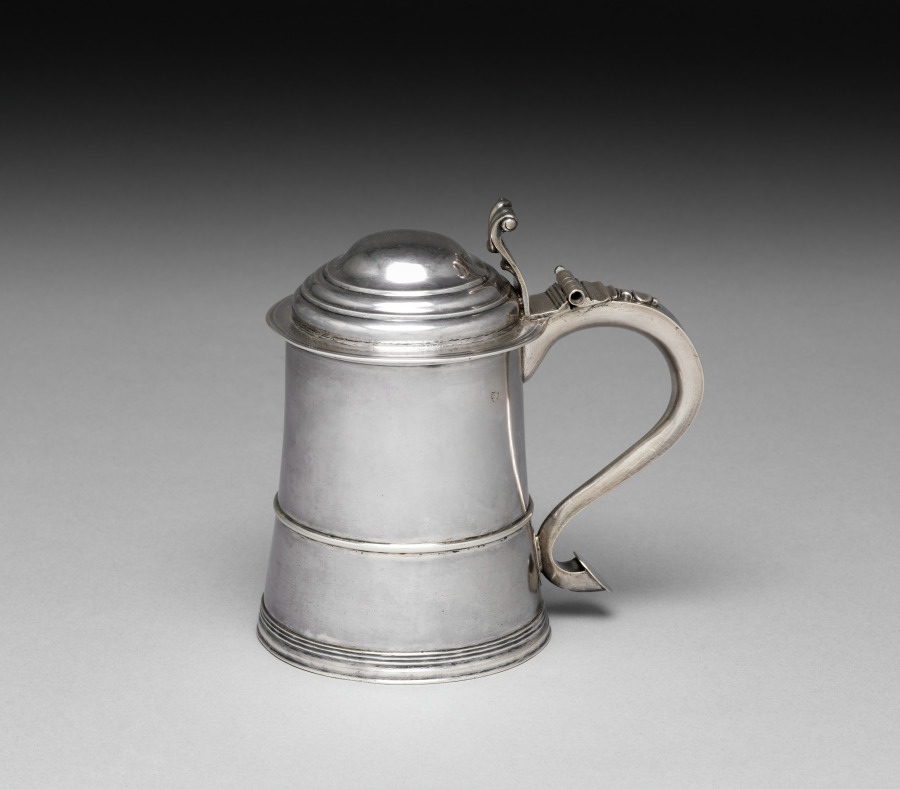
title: Tankard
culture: America, Massachusetts, Boston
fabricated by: Edward Winslow (American, 1669–1753)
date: c. 1725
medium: silver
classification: Silver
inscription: Engraved on handle: "R" over "I + D"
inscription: Stamped on side: "EV"